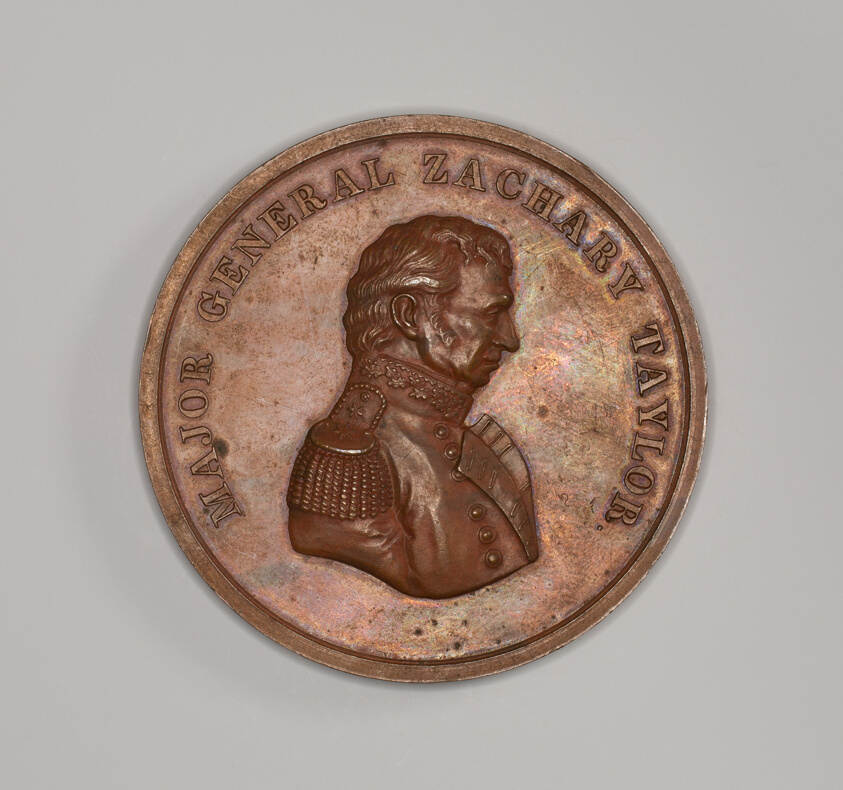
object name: Decorative Arts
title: Medal commemorating Major General Zachary Taylor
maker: Charles C. Wright; American, active 1846–1847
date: 1847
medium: Copper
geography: United States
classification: medal; american decorative arts; american arts; decorative arts